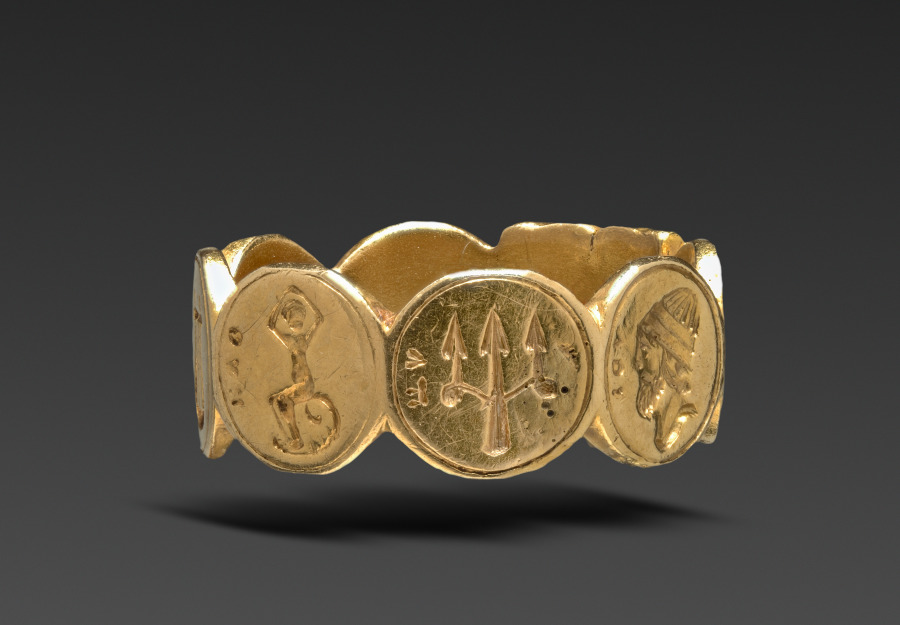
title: Signet Ring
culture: England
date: c. 1550–1600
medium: gold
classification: Jewelry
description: This type of multiple sided signet ring was popular in the later half of the 17th century.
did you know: When pressed into hot wax, a reverse image of the seal would be revealed.